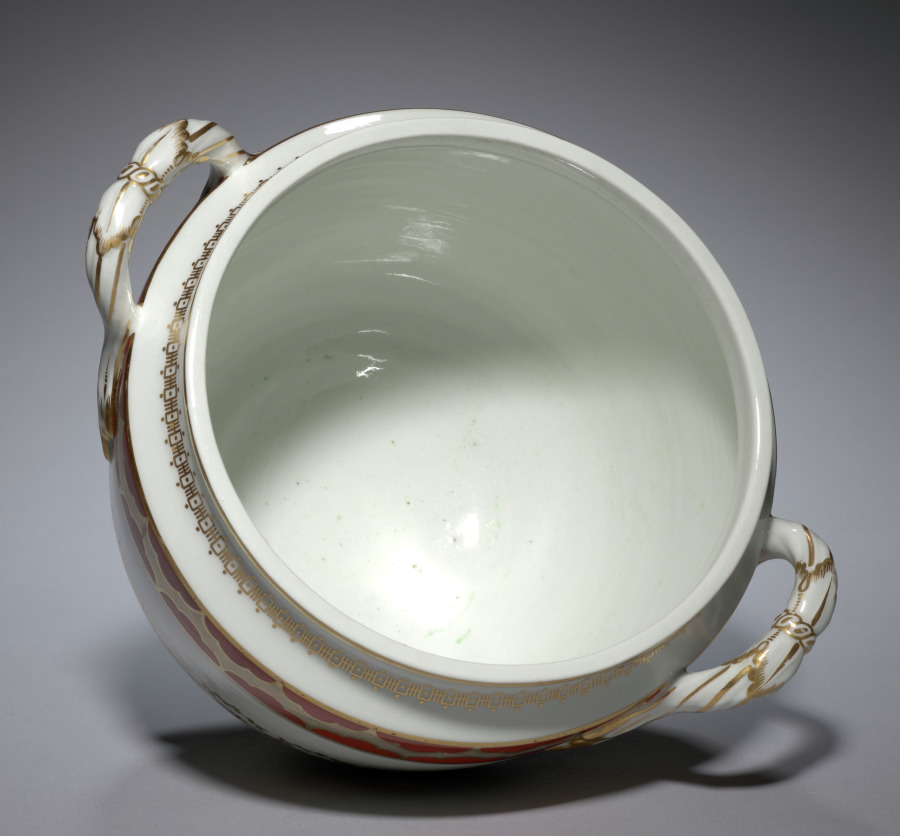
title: Ice Pail (1 of 2)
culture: England, late 18th-early 19th Century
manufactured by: Flight & Barr (British)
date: c. 1792–1804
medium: porcelain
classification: Ceramic